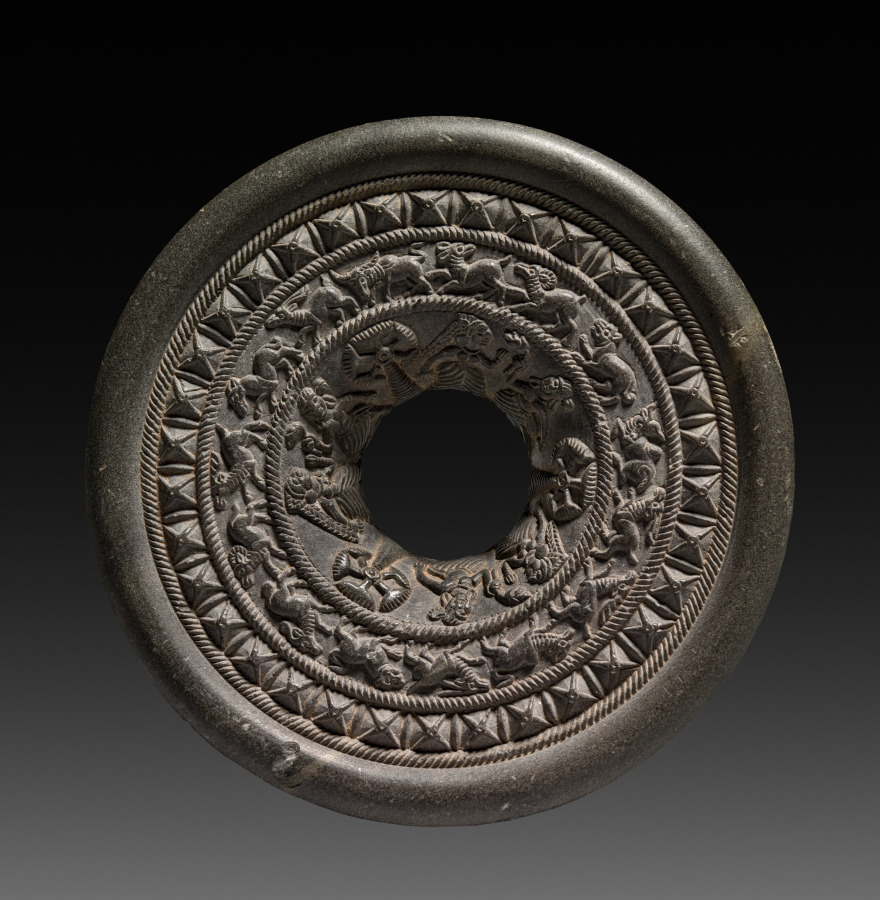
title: Ringstone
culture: India, Maurya period (322–185 BCE)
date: 200s BCE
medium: steatite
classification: Sculpture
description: Ringstones are among the earliest works of art to be created in stone during India's historical period. This example is finely carved with detailed images of affectionate couples and palm trees, running animals, and geometric motifs in concentric circles. The function of ringstones remains uncertain, since none of the surviving examples is inscribed or explained in a text.